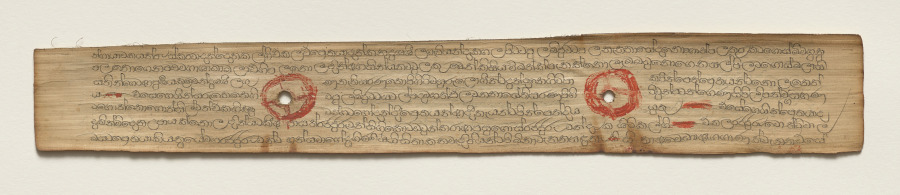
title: Leaf from a Buddhist Manuscript (verso)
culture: Sri Lanka, Singhalese, Late 17th century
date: c. 1700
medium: fiber paper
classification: Manuscript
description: Palm leaf material is still used for manuscripts in Sri Lanka. The palm leaves are prepared first by boiling them, drying them in the sun, and then rubbing them with oils. Scribes then use a metal stylus to incise the text. Then charcoal powder is wiped across the pages, filling in only the inscribed lines.